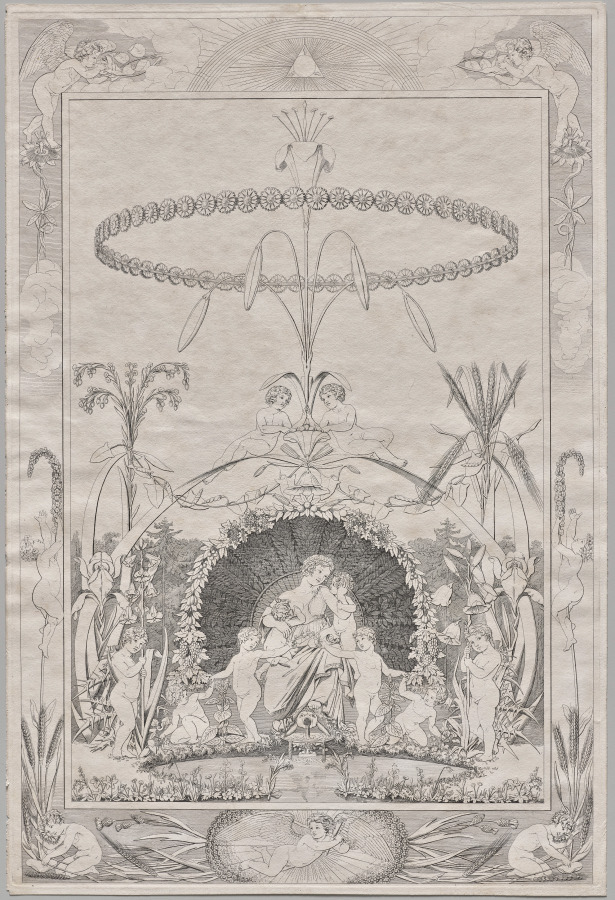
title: Day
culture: Germany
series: Times of Day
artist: Philipp Otto Runge (German, 1777–1810)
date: 1803–5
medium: etching on heavy wove paper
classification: Print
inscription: Written in pencil on mat: "Tag"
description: Phillip Otto Runge’s large-scale, four-part print series, Tageszeiten (Times of Day), is a landmark of German Romantic printmaking, capturing the “new art” promoted by Runge and his contemporary, Caspar David Friedrich, one rooted in a more personal and spiritual response to nature. Runge presents allegories of nature as a means to understand God and the sublime on earth. His four-part series represents not only the four times of day but also the seasons and the stages of human life, while contrasting eternal time with human time through various literary and religious references. Viewing the series from Morning to Night, seedlings emerge from the earth, bloom, decay, and die. Young spirits or children are born, mature, and grow old, eventually entering a sleep reminiscent of death. A female figure appearing in two scenes, possibly Mother Nature, inspires abundance and then embraces its decline, suggesting nature’s continuity despite human mortality. In each plate, Runge contrasts eternal time with human time, or spirituality with physicality, by contrasting the iconography in the borders with that in the centers.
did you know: After receiving a set of Times of Day as a gift from the artist, the German author Johann Wolfgang von Goethe (1749–1832) apparently exclaimed, “it’s enough to drive you crazy—beautiful, and mad at the same time!”